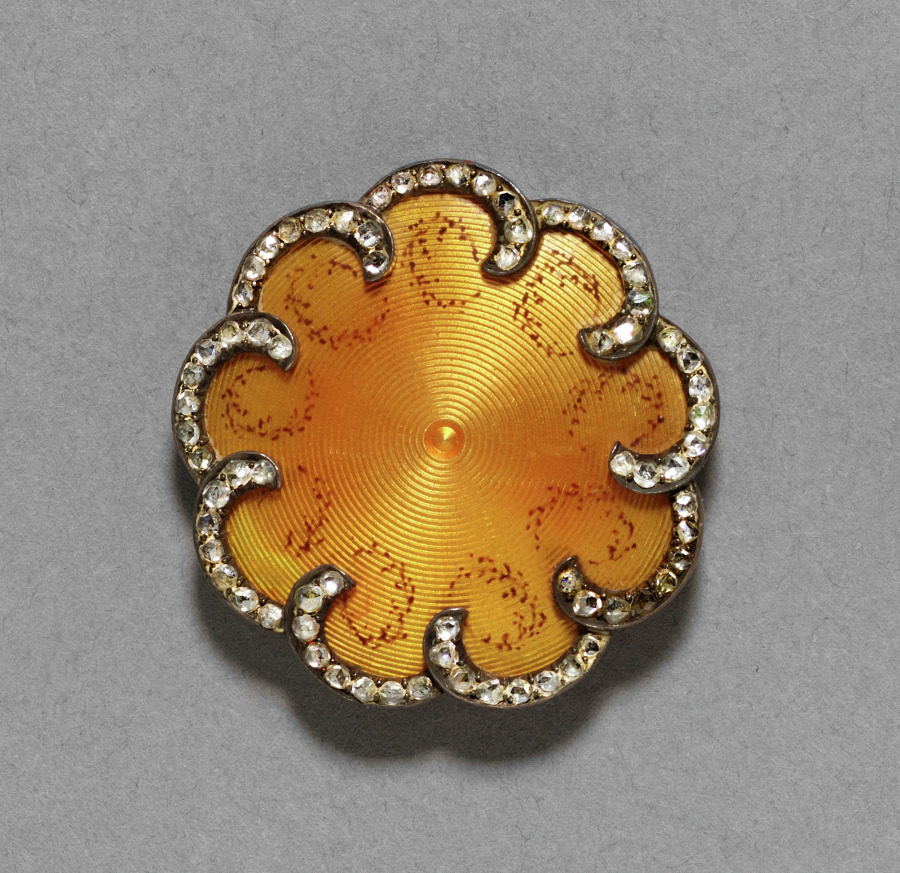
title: Button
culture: Russia, St. Petersburg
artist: firm of Peter Carl Fabergé (Russian, 1846–1920)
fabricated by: August Wilhelm Holmström (Russian, 1929–1903)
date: after 1896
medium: gold, enamel, diamonds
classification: Miscellaneous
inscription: inscribed: double-headed eagle; Fabergé; St. Petersburg, Moscow (all in Cyrillic; inside lid of box).